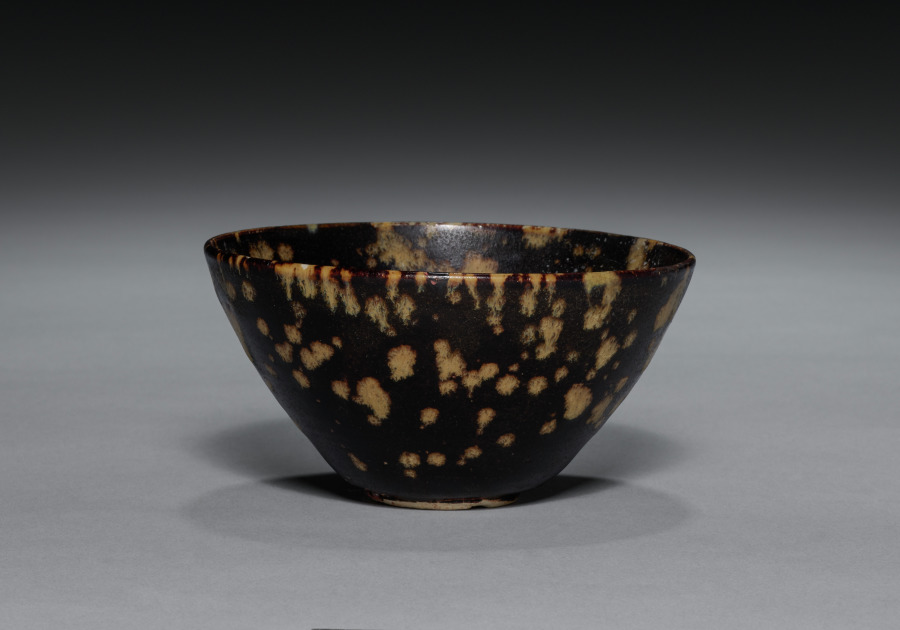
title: Teabowl with Tortoiseshell Glaze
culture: China, Jiangxi Province, Southern Song dynasty (1127–1279)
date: 1100s–1200s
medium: Brown-glazed stoneware with "tortoiseshell" pattern, Jizhou ware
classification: Ceramic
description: This teacup with a so-called tortoiseshell glaze is a fine example of southern ware from Jizhou, where potters specialized in brown splashed glazes sometimes resembling partridge feathers or tortoise shells. The variety of dark glazes and vessel types produced by the Jizhou kilns are evidence of the popularity of black ware at the time. Jizhou kiln potters competed with the Jian kilns which produced almost exclusively teacups, such as the Black-Glazed Teabowl (CMA 2020.176) and the Black-Glazed Teabowl with Incised Characters (CMA 2020.175).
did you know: The Jizhou kiln site is designated as one of fifty-one Major National Historical and Cultural Sites in Jiangxi province.